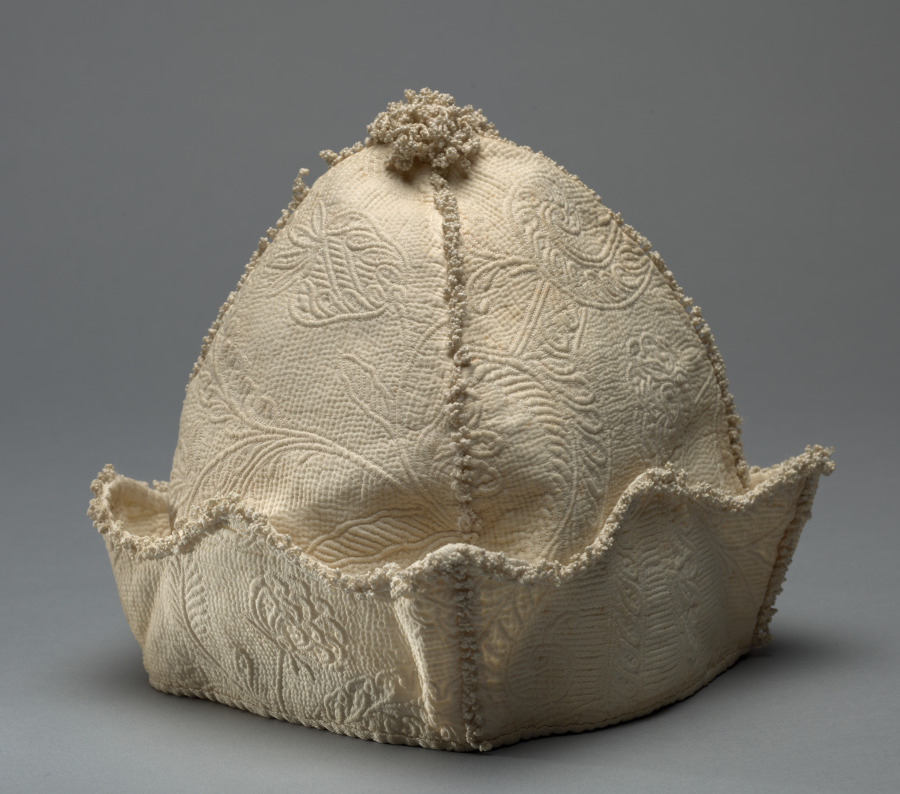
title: Man's Cap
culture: Denmark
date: 1600s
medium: linen with cotton design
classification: Garment